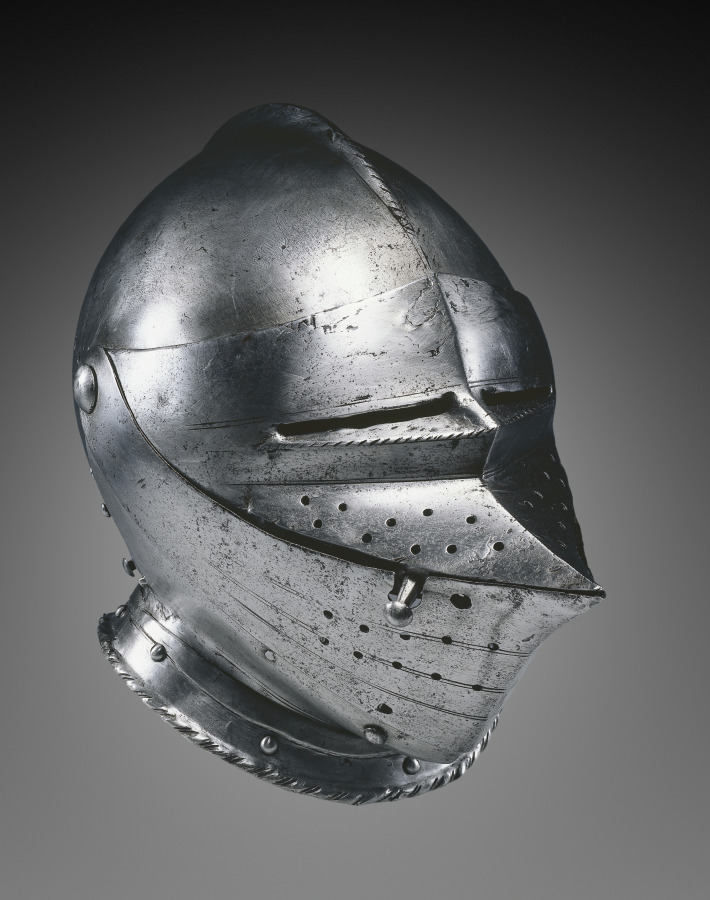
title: Close Helmet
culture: Germany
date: c. 1510–30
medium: steel with black paint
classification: Arms and Armor